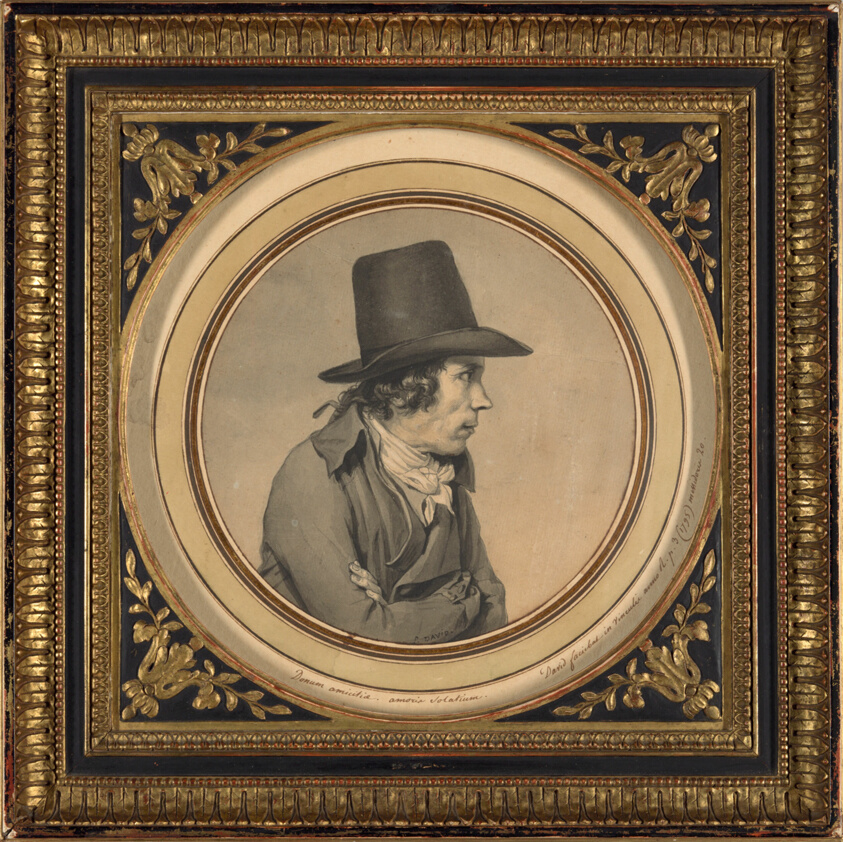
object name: Drawing and Watercolor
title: Portrait of Jeanbon Saint-André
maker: Jacques-Louis David; French, 1748-1825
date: 1795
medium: Pen and black ink and brush and black ink with yellow ocher watercolor over graphite, on cream laid paper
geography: France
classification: pen and ink drawings; drawings (visual works); prints and drawing